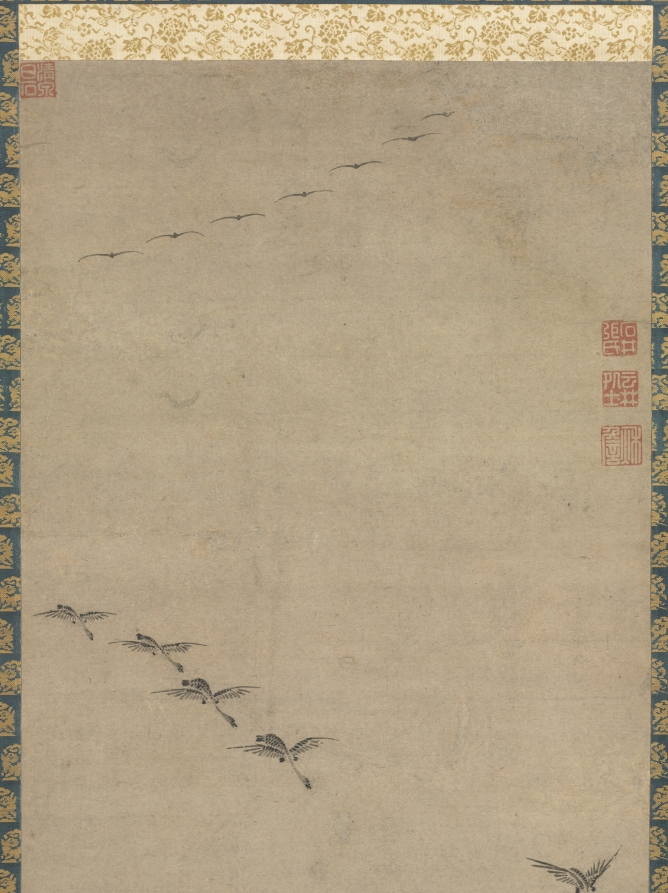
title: Geese Returning Home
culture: Korea, Joseon dynasty (1392–1910)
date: 1600s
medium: hanging scroll; ink on paper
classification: Painting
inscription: three seals in upper right; one in upper left corner.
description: In this hanging scroll, wild geese are portrayed engaging in different activities: descending to a marsh, gathering in flocks, grazing on plants, and dipping their heads under the water. In Korean paintings, images of geese serve as the symbol of seasonal change because they migrate from northern areas such as Siberia to stay in the Korean Peninsula during the late fall and winter.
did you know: In Korea, the word for geese in a grove of reeds, noan, has the same pronunciation as the word for "the comfortable life at old age." With this double meaning for a happy life, the motif of returning geese gained popularity in paintings.